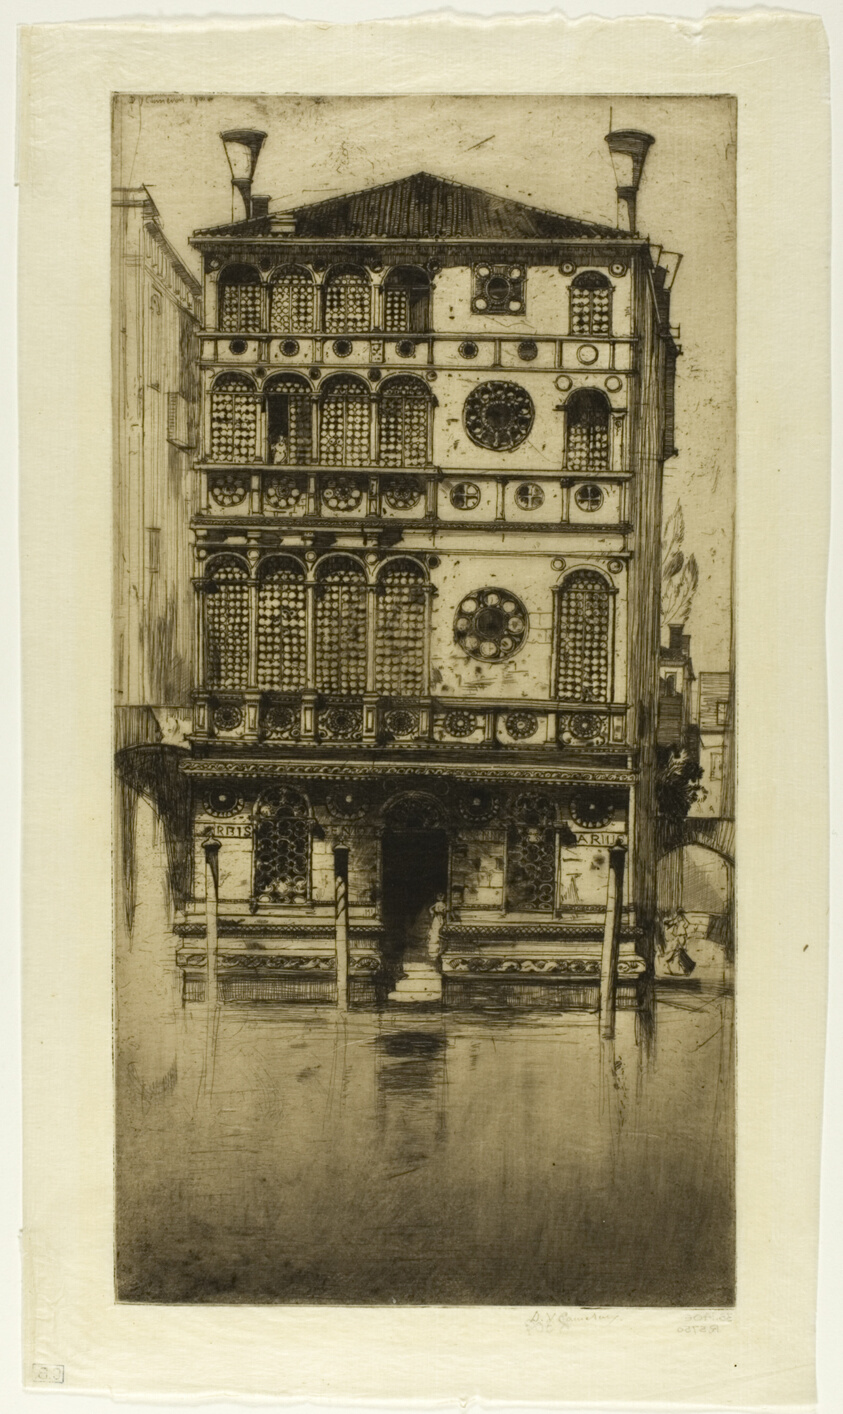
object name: Print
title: Joannis Darius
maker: David Young Cameron (Scottish, 1865-1945)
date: 1900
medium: Etching and drypoint on ivory Japanese paper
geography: Scotland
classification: etching; print; prints and drawing